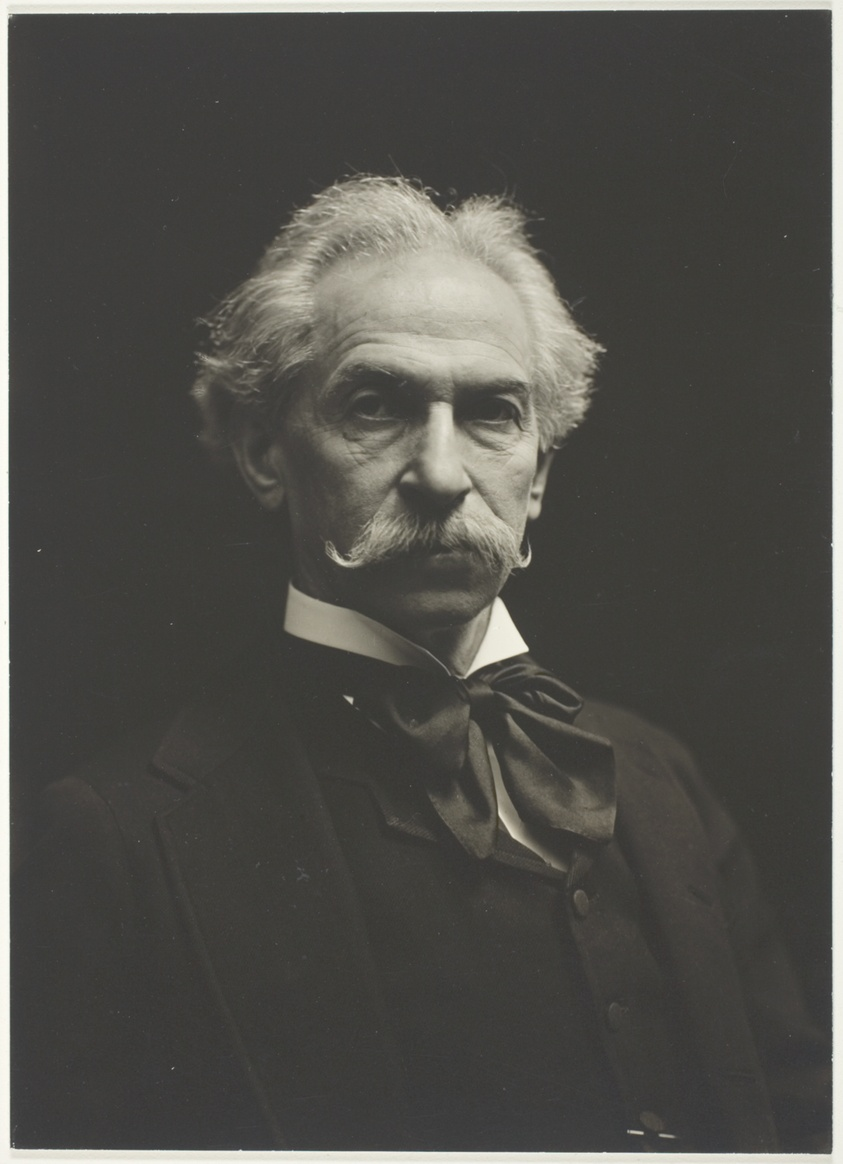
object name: Photograph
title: My Father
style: 19th century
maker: Alfred Stieglitz (American, 1864–1946)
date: 1894, printed 1920/39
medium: Gelatin silver print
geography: United States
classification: gelatin silver (developing-out-paper) pr; photographic process; photography; photograph